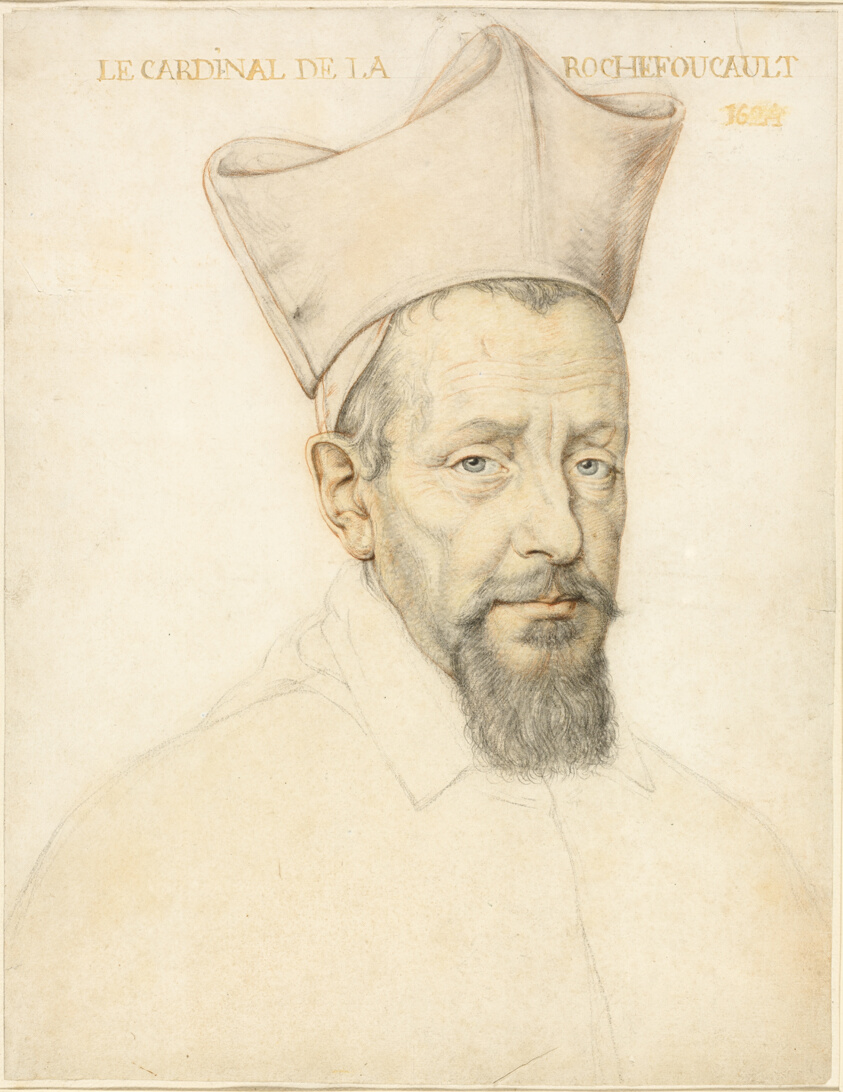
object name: Drawing and Watercolor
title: Bust of Cardinal de la Rochefoucault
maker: Daniel Dumonstier (French, 1574-1645)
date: 1624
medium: Black and red chalks, with stumping, brush and pale yellow and orange wash, on ivory laid paper, laid down on cream laid paper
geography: France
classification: chalk; drawings (visual works); prints and drawing